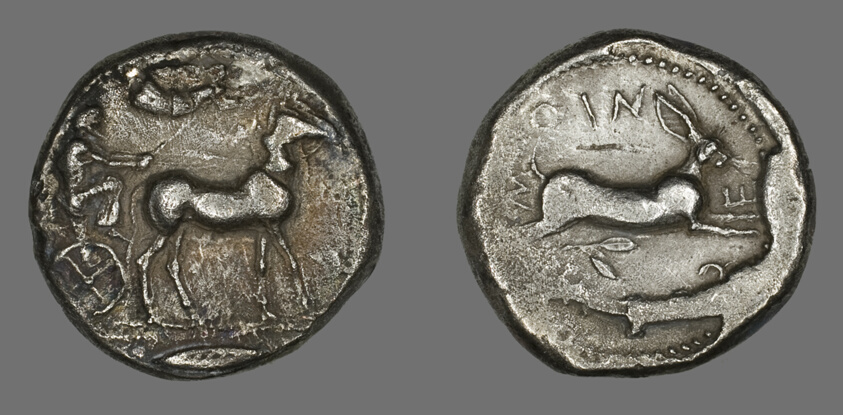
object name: Coin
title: Tetradrachm (Coin) Portraying Biga with Mules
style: archaic (greek)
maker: Greek; minted in Messana, Sicily, Italy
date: 484-476 BCE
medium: Silver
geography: Ancient Greece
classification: coin; ancient art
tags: Chariots